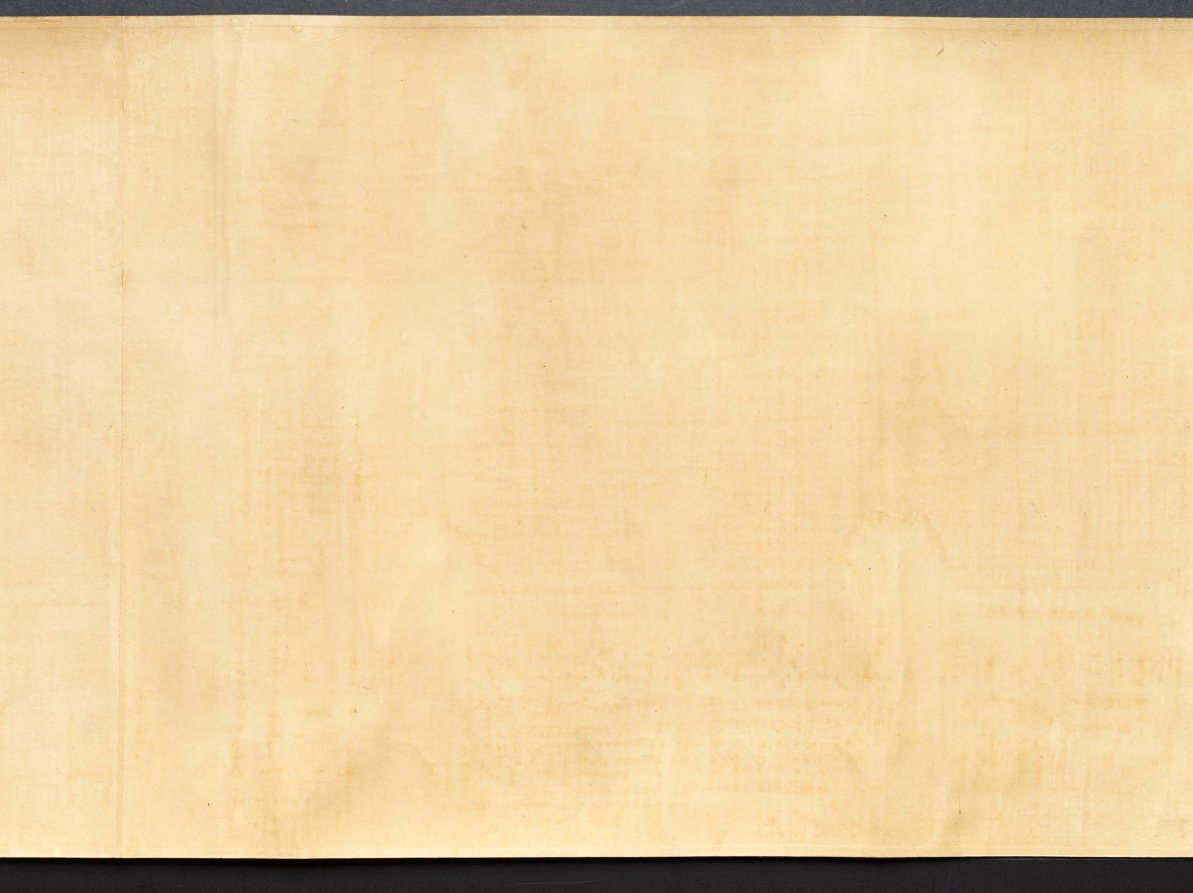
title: People Fleeing from a Fire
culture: Japan, Edo period (1615–1868)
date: 1615–1868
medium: Handscroll; color and gold on paper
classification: Painting